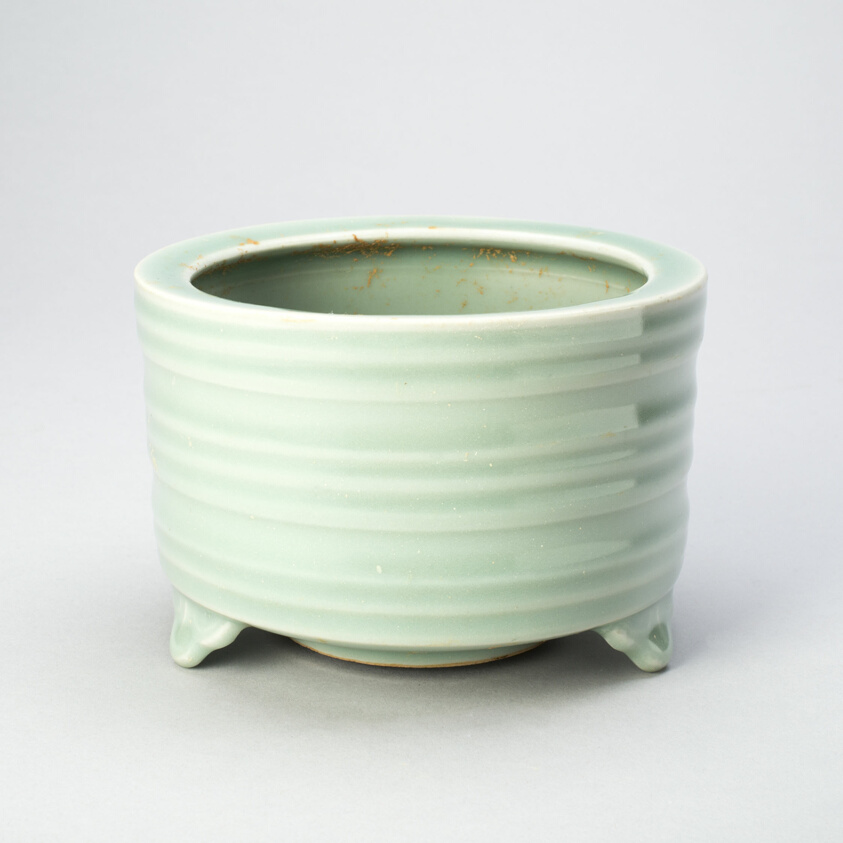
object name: Vessel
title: Cylindrical Tripod Censer (Incense Burner) with Cloud-Scroll Feet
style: Chinese (culture or style)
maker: China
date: Southern Song dynasty (1127–1279), 12th/13th century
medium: Longquan ware; stoneware with underglaze molded decoration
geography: China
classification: vessel